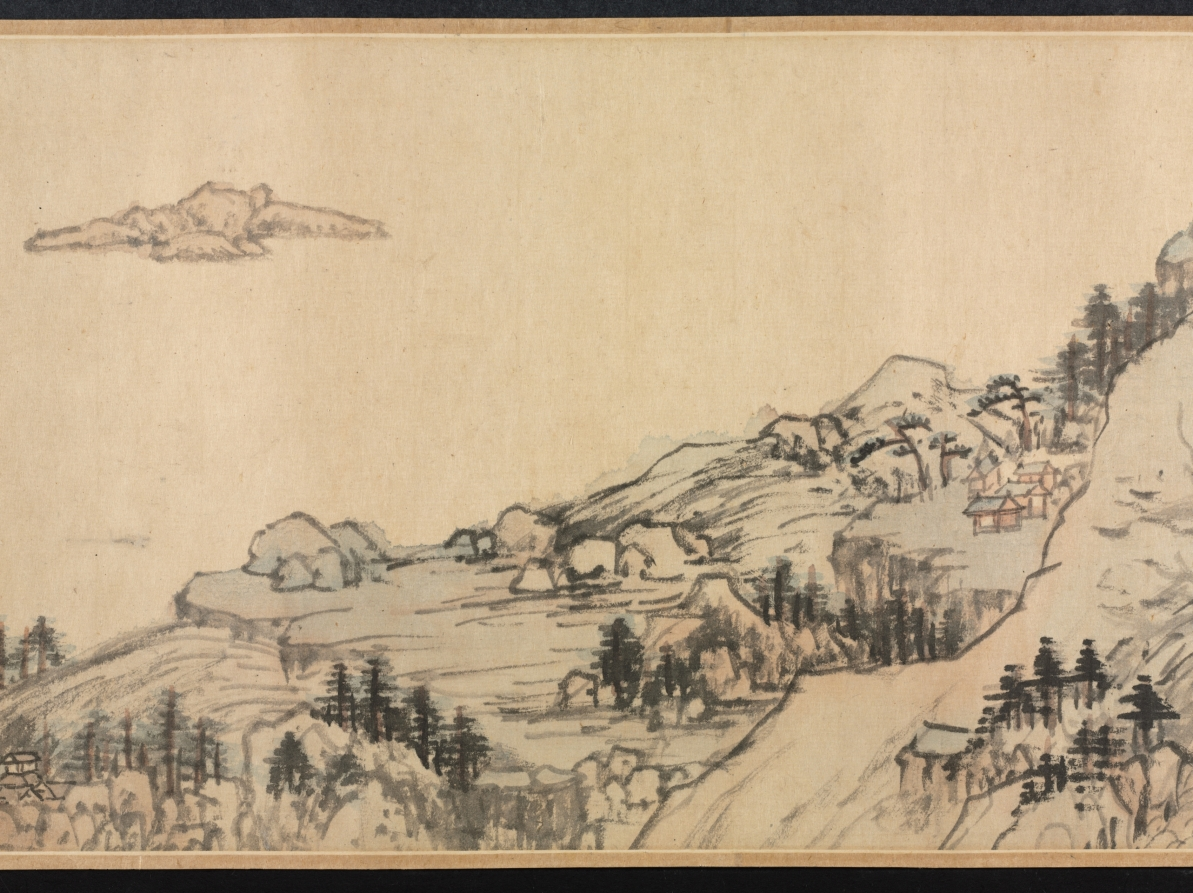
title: Dream Journey among Rivers and Mountains, no. 90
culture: China, Qing dynasty (1644-1911)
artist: Cheng Zhengkui (Chinese, 1604–1676)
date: 1658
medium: Handscroll; ink and color on paper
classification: Painting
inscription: 江山臥遊圖其九十, 青溪道人, 戊戌夏五。 [印] 程正揆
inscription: Title and inscription by Huang Yi 黃易 (1744–1802), and 3 seals.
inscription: 1 colophon and 9 additional seals: 3 seals of Dai Zhi 戴植 (active about 1821–1850); 1 colophon, dated 1914, and 3 seals of Yan Shiqing 顏世清 (1873–1929); 3 seals of Wang Nanping 王南屏 (1924–1985).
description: Cliffs and waterfalls interspersed with trees and dotted vegetation are spread over this handscroll. Long paths wind their way through villages, beside cottages, shrines, and over bridges. In the past, Chinese literati officials liked to take a “dream journey” along mountains and rivers when viewing landscape paintings in their studios. Scenery of this kind thus became a way to escape from the world of bureaucracy and administration. The painter Cheng Zhengkui used the title “Dream Journey” for a whole series of paintings, of which this is number 90. He is said to have painted 500 of them, but the actual count remains unknown.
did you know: Cheng Zhengkui planned to make 100 dream journey paintings but may have ultimately made 500.